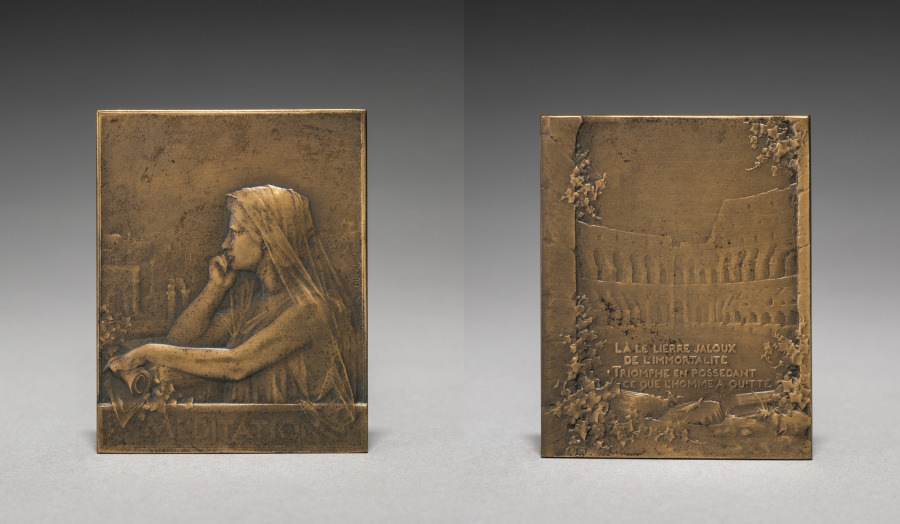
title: Medallion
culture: France, 19th-20th century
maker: Georges Dupré (French, 1869–1909)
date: c.1899–1903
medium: bronze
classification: Metalwork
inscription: "Meditation"; signed: "G. Dupré."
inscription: "La le lierre jaloux de l'immortalite triomphe en possedant ce que l'homme a quitte"